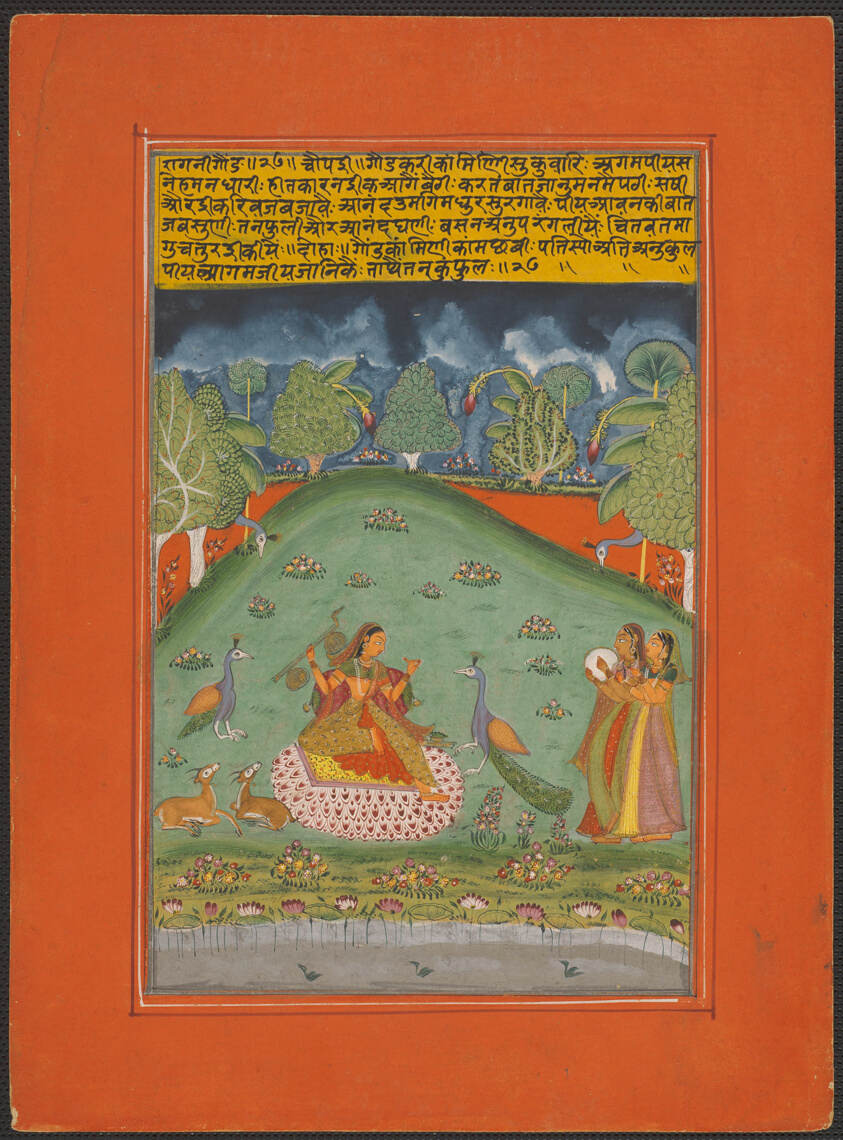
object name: Painting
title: Ragini Gaund, Page from a Jaipur Ragamala Set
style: South Asian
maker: India; Rajasthan, Jaipur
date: c. 1750-1770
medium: Opaque watercolor and gold on paper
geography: Rajasthan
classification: tempera; painting; asian art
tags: music, musicians